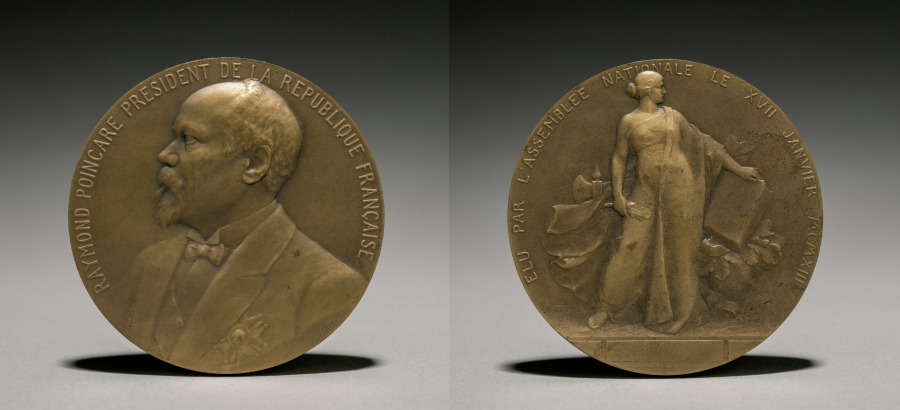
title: Poincarè Medal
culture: France, 20th century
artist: Léon Julien Deschamps (French, 1860–1928)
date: 1900s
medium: bronze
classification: Metalwork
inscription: obverse - "Raymond Poincarè President de la Republique Francaise." reverse - woman holding book on which is inscribed: "Poincarè President de la Republique Francaise"; above: "Elu par l'assemblee nationale le XVII Janvier MCMXIII."